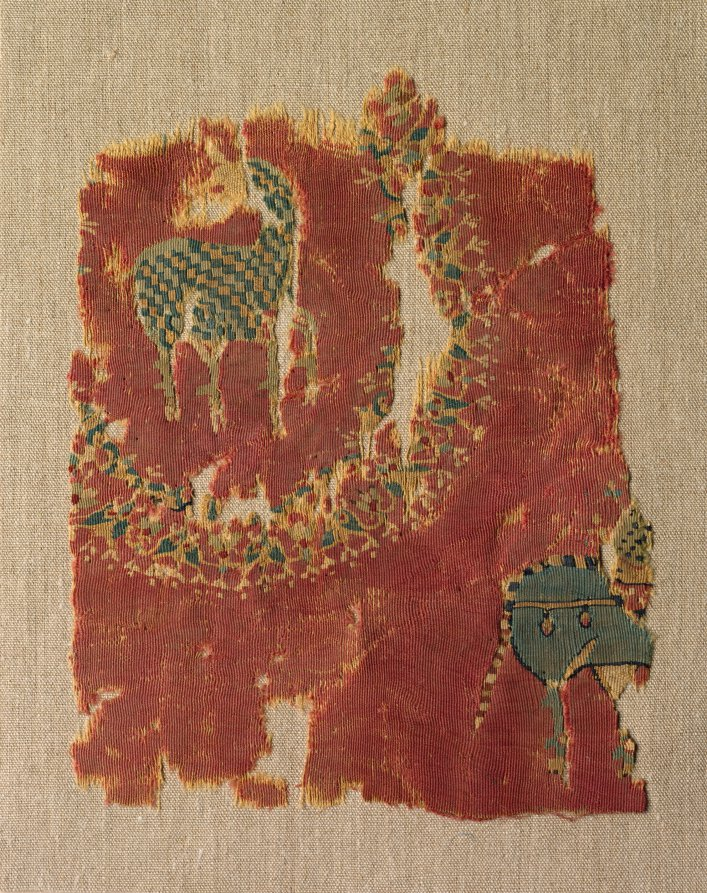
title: Hanging with foliate roundel and rider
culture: Iran or Iraq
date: 700s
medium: tapestry weave: wool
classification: Textile